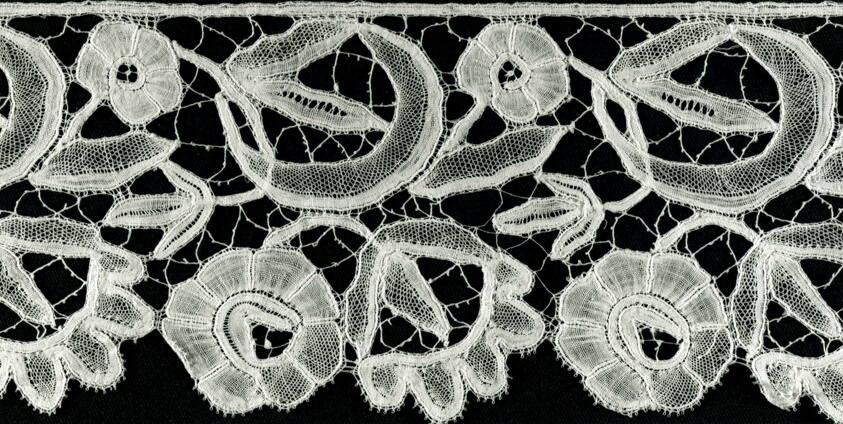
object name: Textile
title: Border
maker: Belgium, probably Bruges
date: 19th century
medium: Cotton, bobbin part lace of a type known as "Duchesse de Bruges"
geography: Belgium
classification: textile; lace - bobbin